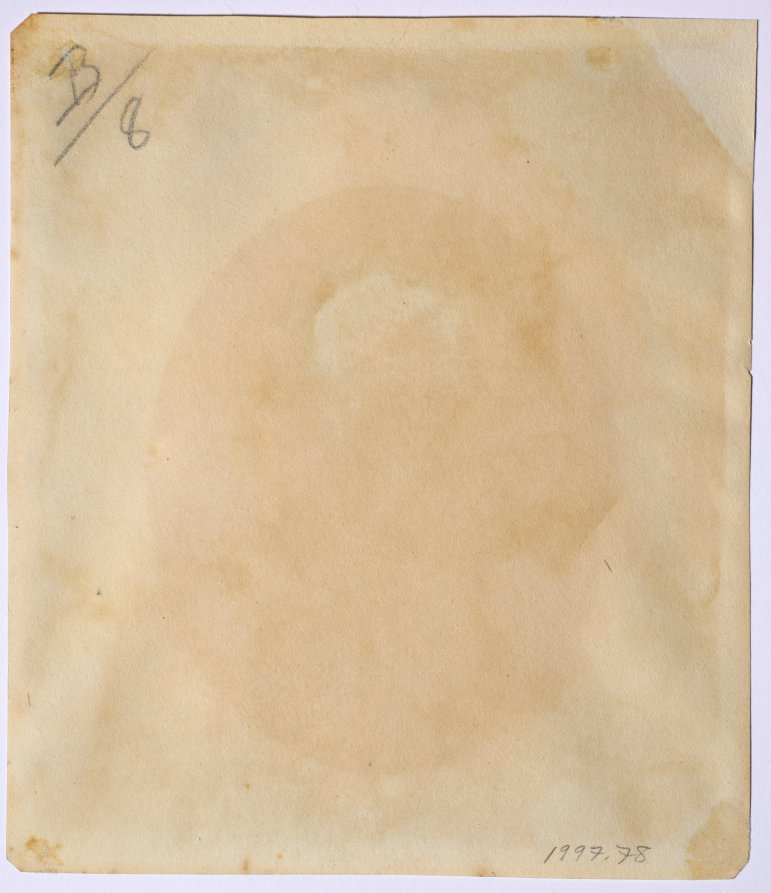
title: Portrait of Miss Mary Tadman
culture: England, 18th century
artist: John I Smart (British, 1741–1811)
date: 1809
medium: watercolor and graphite, heightened with traces of white gouache on paper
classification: Portrait Miniature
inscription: signed, lower right, in gray watercolor: John Smart pinxit / Novr. 1809 ; by artist, lower left, in gray watercolor: Miss Mary Tadman ; VERSO, upper left, in graphite: B/8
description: Mary Tadman’s head and shoulders face right. Her eyes are brown, and she wears a necklace of small pearls and a drop pearl earring. She wears her dark brown hair high in a classically inspired bun, with a braid across the hairline and many curls falling over her forehead and in front of her ears. Her white dress is delicately embroidered at the edges along the bust and is tied at the empire style waist, with a small pin fastened to the front. The translucent white sleeves worn beneath the dress are probably made of muslin and detachable, since they do not appear in the ivory version of the portrait. Detachable sleeves were popular during the late eighteenth and early nineteenth centuries and enabled a dress to function as day- and eveningwear. The nature of this work as a finished drawing rather than exclusively a preparatory sketch for a miniature on ivory is evident in the degree of finish of the sitter’s clothing, heightened with white gouache and painted to the elaborated penciled oval border. In December 1809, the year this drawing was executed, Mary Tadman (1786–1862) married Major William Jolliffe Eldridge. He died in 1818 in Poona, India, and three years later, his widow married Colonel Daniel Hutchins Bellasis (1785–1836), with whom she had two children: Flora and Augustus Fortunatus. Mary lived for nearly two decades in India, where she was a celebrated beauty, and where her second marriage into the militarily distinguished Bellasis family seems to have secured her presence in high society. On the occasion of her marriage in 1821, she wrote her spinster sister, “I forgot I have not told you a word of my marriage, which by the by was the grandest affair known in Bombay, I am almost tired of the subject—visits and congratulations, etc. The Governor and Staff went with me to Church . . . and all the people of any consequence in Bombay about 100 came to a Breakfast at Randall Lodge—since which it has been one constant scene of gaiety. Last week, pity me when I tell you, how I was obliged to exert myself—we gave a dinner party to 40 people. The Governor’s family . . . and all the Big Wigs who gave me parties—the same evening 160 came at ten to a dance—afterwards a supper very splendid I assure you.” A related ivory version of this miniature is in the Fitzwilliam Museum, Cambridge, signed and dated at the lower left: “J S / 1809.” While Miss Tadman’s coiffure, countenance, jewelry, and dress are identical to the Cleveland sketch, in this portrait she wears an elaborate black and red, flowered Indian shawl with white border over her white dress, the under-sleeves omitted. Indian shawls, particularly those from Kashmir, were extremely expensive signifiers of social status in India and Europe, and by the end of the eighteenth century, they often formed part of the trousseau of a wealthy French or English bride. The shawls were particularly fashionable worn in contrast with the high-waisted gauzy white dresses of the Empire period. While many portraits and miniatures from the early nineteenth century depict women conspicuously displaying their Indian shawls, Miss Tadman wears hers in a manner not often seen in European portraits: across one shoulder and around the waist, like a sari. Mary and William Eldridge wed in December 1809, one month after Smart signed this sketch. Because Smart depicted Miss Tadman during her engagement, the shawl worn in the finished ivory portrait may have been a gift from her betrothed, who had been stationed in Bombay in 1809. While appropriate for a half-length portrait, the under-sleeves were probably deemed unnecessary for the miniature, which shows little of the arm and instead depicts the sitter more formally, wrapped in her shawl. The existence of a larger, finished drawing as well as a miniature on ivory suggests that the finished drawing may have served a variety of roles, while also implying that another preparatory sketch for both may exist. At nearly twice the size of the ivory, Cleveland’s drawing is not likely to have been the sole preparatory exercise for the finished miniature. There is no question that as a young bride-to-be, Miss Tadman was thinking carefully about how she wished to be represented at a pivotal moment in her life, and that a single portrait was insufficient to accommodate all of the accoutrements that were of significance to her. The neo-Grec coiffure, au courant empire waist dress with detachable sleeves, pearl parure, ornamental pin, and costly shawl communicate clearly the social ambitions to which her biography is also a testament.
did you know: This drawing was passed on through the generations of the artist John Smart's family until 1937 when his great-granddaughter sold it.